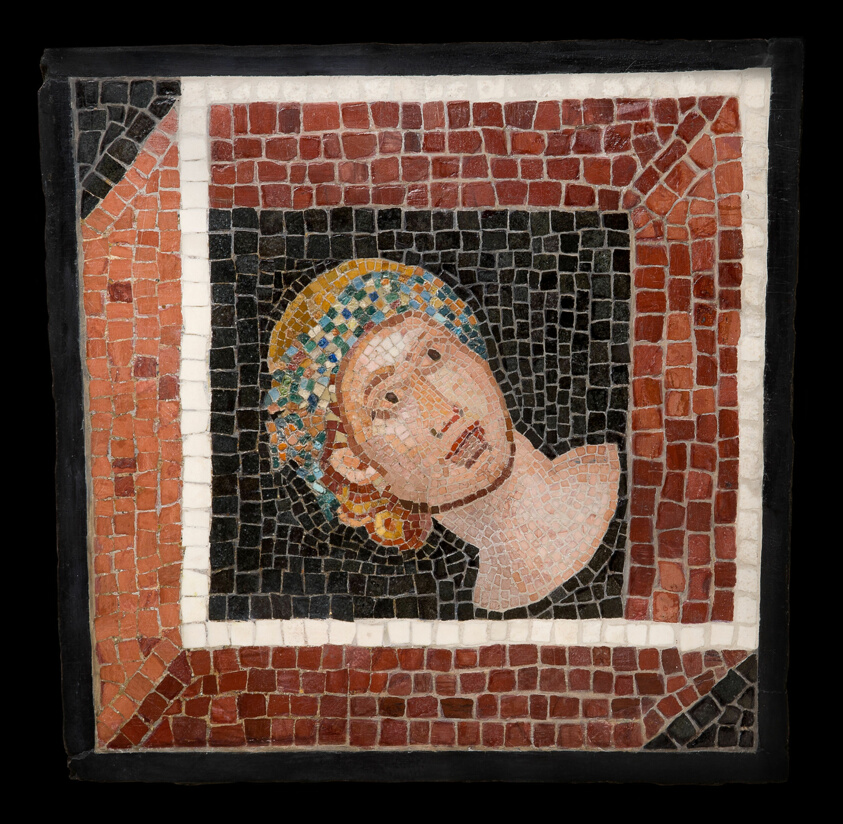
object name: Architectural fragment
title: Mosaic Floor Panel Depicting a Personification of a Season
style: roman (ancient, style or period)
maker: Roman; Rome, Italy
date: 2nd century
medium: Stone, glass, mortar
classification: architectural fragment